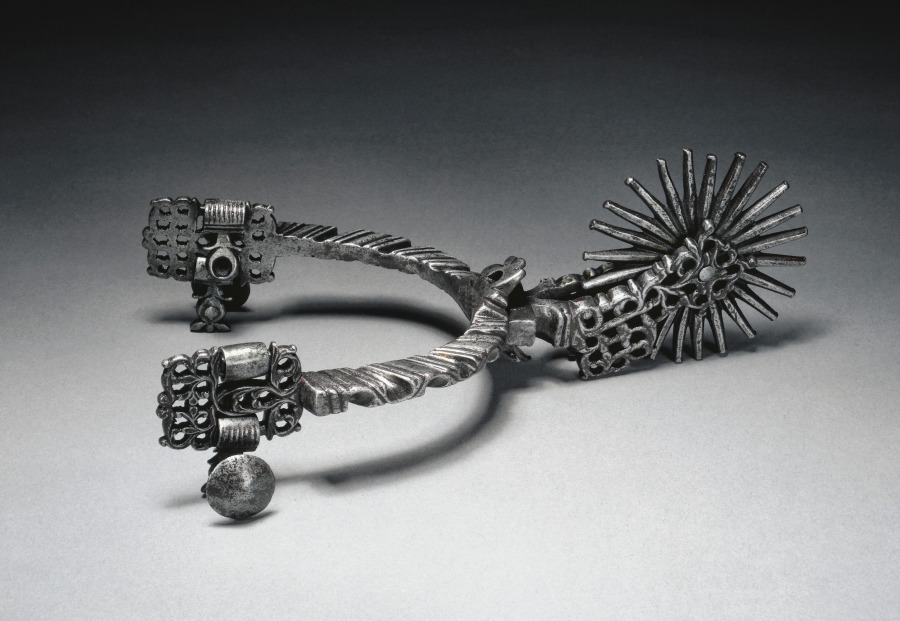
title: Rowel Spur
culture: Spain, early 18th Century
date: c. 1700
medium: steel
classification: Arms and Armor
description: Instead of a "prick" terminus at the neck, the rowel spur had a rotating wheel installed between two prongs. This type of spur gradually supplemented the prick spur as a safer and less severe alternative for the horse. Rowel spurs first appeared during the 1200s and were in general use by the 1300s.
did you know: Spurs became more than an equestrian tool, but a piece of male jewelry that would be worn even not when riding.